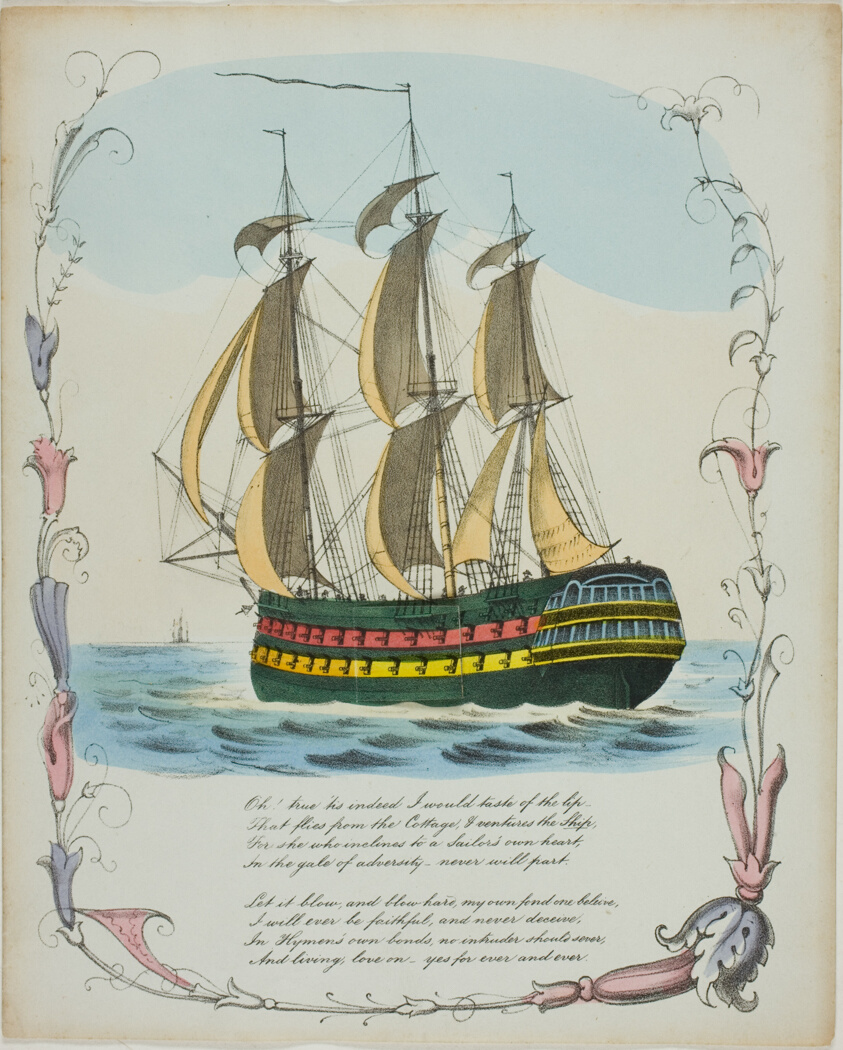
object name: Print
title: Oh! Tis True Indeed I would Taste of the Lip (valentine)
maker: Unknown Artist; English, 19th century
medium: Lithograph with hand-coloring and collaged element on ivory wove paper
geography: England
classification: valentine; prints and drawing; print